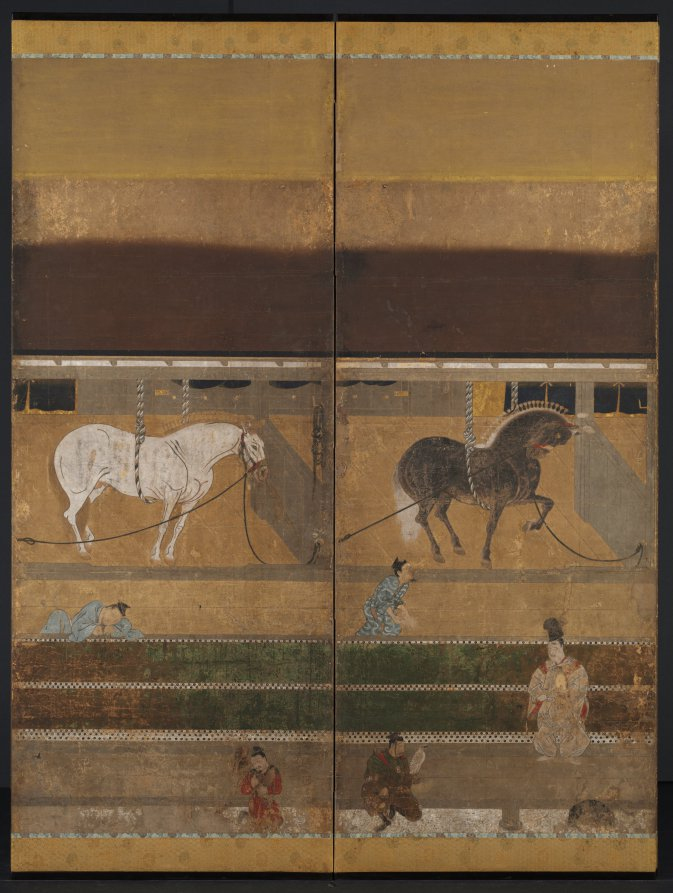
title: Horse Stable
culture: Japan, Muromachi period (1392–1573)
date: early 1500s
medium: One of a pair of six-panel folding screens; ink, color, and gold on paper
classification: Painting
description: Prized horses in stables may be the main theme of the pair of screens of which this screen is a part, but a lot of action is happening on the veranda. Falconry is the focus of this screen, and a lively atmosphere develops in the interplay of the dynamic horses and the birds of prey.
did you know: This is the earliest surviving example of the "horse stable" theme in Japanese screens.